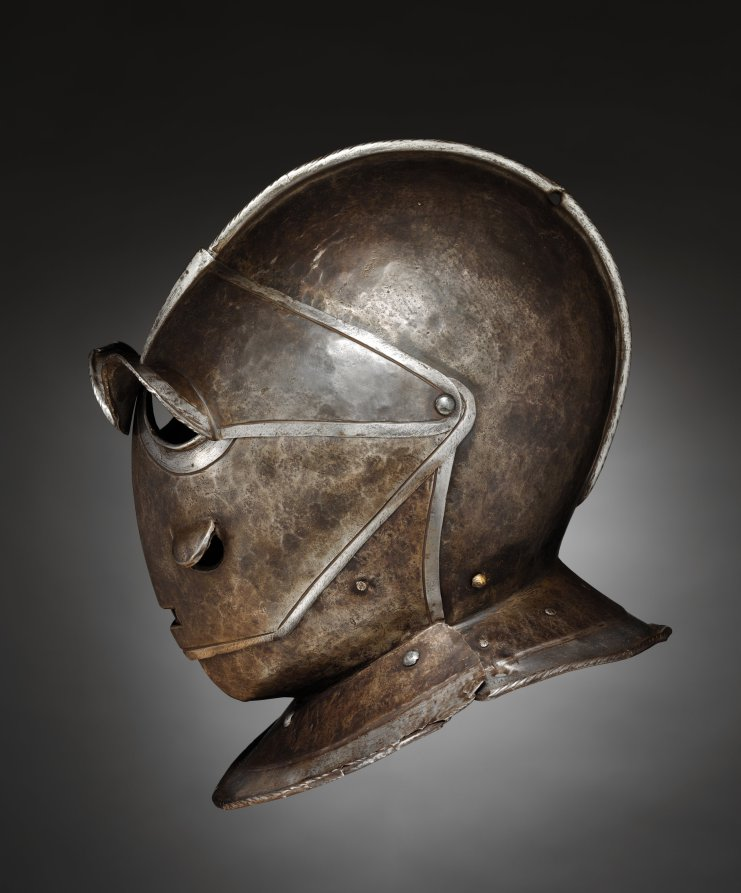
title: Savoyard Helmet (Todenkopf)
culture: Italy or Germany, early 17th century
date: c. 1600–20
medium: steel, blackened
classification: Arms and Armor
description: The term “Savoyard helmet” is used today to evoke the elite cavalry units formed by Charles Emanuel I, Duke of Savoy (1580-1630). Such helmets were designed principally to withstand and protect the wearer from shot from the powerful wheel-lock guns of the day, though their secondary function was to intimidate and terrify. The design of the helmet suggests a human face or skull. They were known as todenkopf or “death’s head” helmets in Germany. The helmet would have originally been associated with a three-quarter cuirassier armor. Similar armors are displayed nearby.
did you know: This type of helmet is also called a "todenkopf," translating to "death's head."